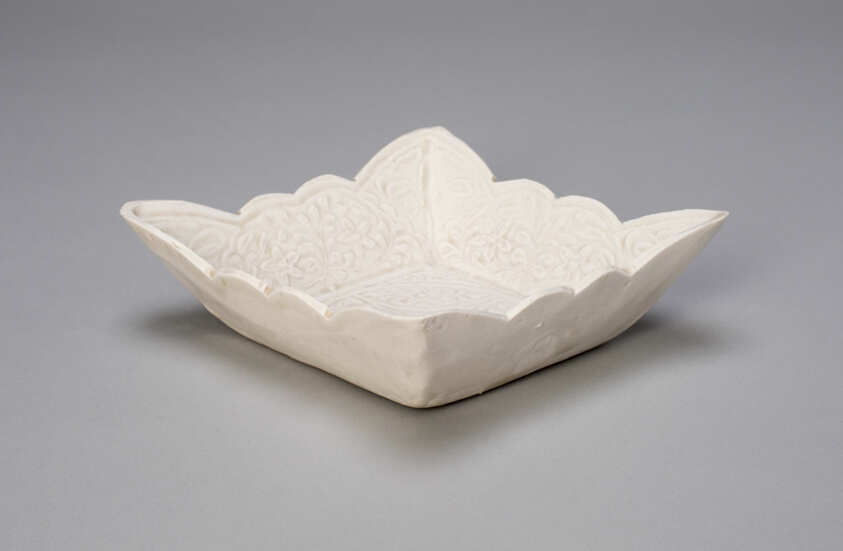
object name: Vessel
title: Foliate Square Dish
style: Chinese (culture or style)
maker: China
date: Liao dynasty (907–1124), late 10th century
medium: Porcelain with creamy white glaze and underglaze molded decoration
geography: China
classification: dish (vessel); porcelain; asian art; ceramics; vessel